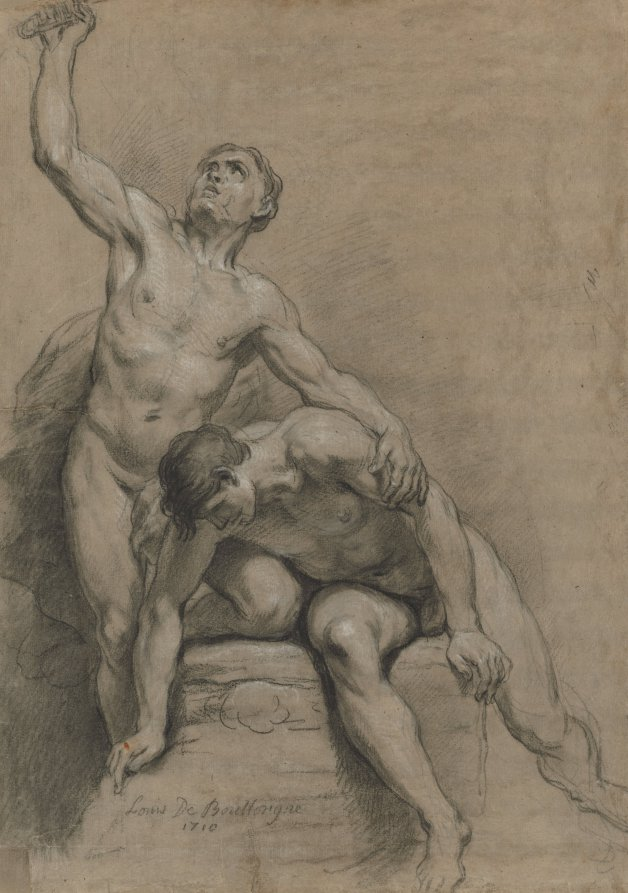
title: Two Male Nudes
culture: France, 18th century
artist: Louis de Boullogne (French, 1654–1733)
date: 1710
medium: black chalk, heightened with white chalk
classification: Drawing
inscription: signed, lower center, in black chalk: Louis De Boullongne / 1710; verso, lower right, in graphite: 1608 [underlined] / 3; lower center, in graphite: #19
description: Michelangelo’s masterful rendering of the male nude set the standard for many generations of artists studying in academies across Europe. Life drawings (made from nude models) became so essential to an artist’s training at the Royal Academy of Painting and Sculpture in Paris (founded in 1648 by Louis XIV) that finished drawings like these were commonly called academies. Louis de Boullogne served as a professor of life drawing at the Royal Academy between 1694 and 1715. This work reflects the common practice of drawing from two models, which allowed artists to explore a narrative. Here the figures resemble a wounded warrior and his companion.